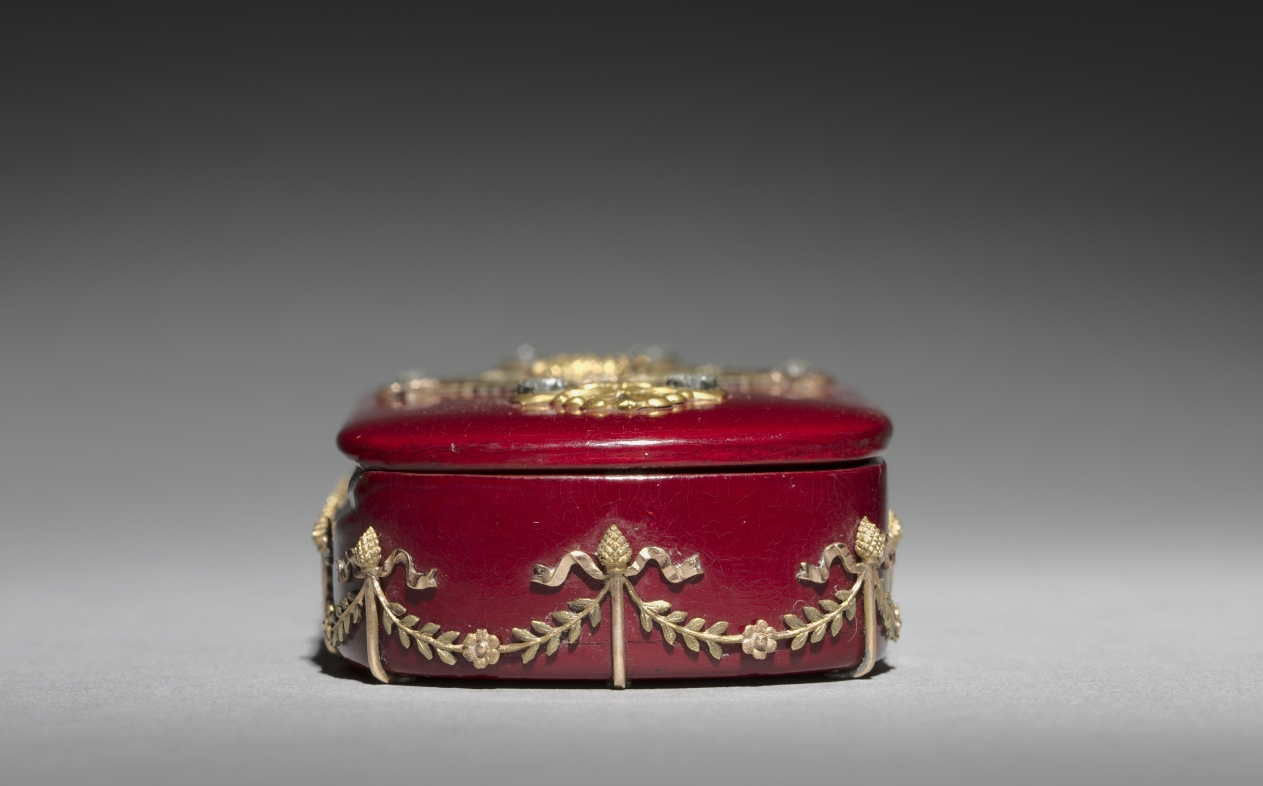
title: Lacquer Box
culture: Russia, St. Petersburg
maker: House of Fabergé (Russian, 1842–1918)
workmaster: Factory N. Lukutin (Russian)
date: c. 1890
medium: lacquer, papier-mâché, gold, diamonds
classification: Miscellaneous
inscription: inscribed (inside cover): Factory N. Lukutine (in Cyrillic script in gold); three double-headed eagles in gold.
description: This lacquer box was created by the Lukutin Factory, which was well known for creating boxes such as this one after Piotr Lukutin took charge of production and expanded the factory to include tea caddies and various desk accessories. This particular box from the Lukutin workshop is remarkable in its detailed gold patterns and diamond inlays that create an intentional contrast with the deep red surface.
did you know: Piotr Lukutin’s workshop employed over 50 skilled painters as well as acted as a school for training apprentices.